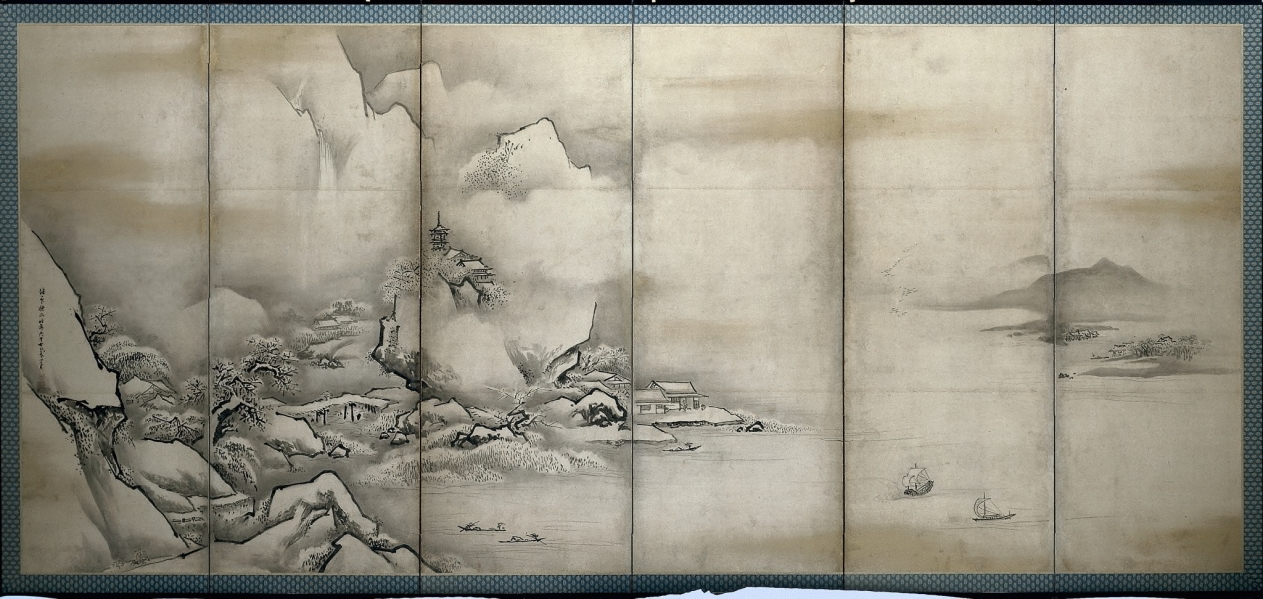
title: The Four Seasons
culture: Japan, Edo period (1615–1868)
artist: Kano Tan’yū (Japanese, 1602–1674)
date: 1668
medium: Six-panel folding screen, ink and slight color on paper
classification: Painting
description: Tan'yū's skills were honed early within the regimen of the Kano family's painting studio. His grandfather, Eitoku (1543–1590) was the Momoyama period's most sought-after painter, a champion of colorful, large-scale painting compositions who worked for several of the country's most powerful leaders. When the young Tan'yū was summoned to Edo in 1617 by the shogun to become a member of the new capital's official painting studio, few opportunities to work on similarly ambitious projects existed. Yet by the end of his career, Tan'yū had supervised the execution and installation of linked mural painting compositions in several of Japan's most prestigious residences and castles. As an official court painter to the first shogun, Tokugawa Ieyasu (reigned 1603–5), and then his successors, Tan'yū appears to have successfully juggled his official duties with private activities as a teacher, as the era's leading connoisseur of classic Chinese and Japanese painting, and as a practicing artist. His surviving compositions as well as thousands of sketches far surpass the oeuvre of any of his contemporaries. While studio assistants surely contributed to his oeuvre, just as later imitators consciously confused his accomplishments, a clearer image of the painter has emerged in recent years that better conforms with his contemporary acclaim as recorded in seventeenth- and eighteenth-century documents. Tan'yū can now be seen as an artist adept in virtually all traditional ink painting subject matter, which he often presented in novel interpretations. Equally important are his rare screen (byōbu) compositions executed in a pure yamato-e manner with vivid mineral pigments on a gold-foil background. This pair of byōbu presents Tan'yū's more orthodox approach to academic ink painting methods embracing Chinese themes that had been interpreted by numerous Japanese ink painters over the centuries. Thus a typical view of residences and human activities set along the shores of an impressive river (or lake) is enlivened by the Japanese proclivity for including seasonal references. Proceeding from right to left, the viewer passes sequentially from spring to the snow-laden branches of winter. Tan'yū lends considerable atmospherics to the panorama in his use of misty cloud banks, frequently set off by sharp, darkened ink lines or whole areas of ink washes of variegated tonalities. The spring and summer views are particularly notable in this regard, as is the presence of the artist's signature on both byōbu, attesting to their completion in Tan'yū's sixty-seventh year (1668)—50 years after he left Kyoto for the capital, and 30 years following his adoption of the artist name "Tan'yū" (in 1635). From 1622, when he began work on the mural paintings for Edo castle (the shogun's formal residence), through the completion of the painting cycle in 1636 for the Tokugawa family mausoleum in Nikkō to the north of Edo, Tan'yū's skills as head of an accomplished painting studio as well as a master painter found their most impressive expression in large-scale compositions. In 1638 he received the honorary Buddhist title Hōgen (Eye of the Law). It is intriguing therefore that relatively few independent byøbu paintings from the master's hand survive, particularly documented early works.